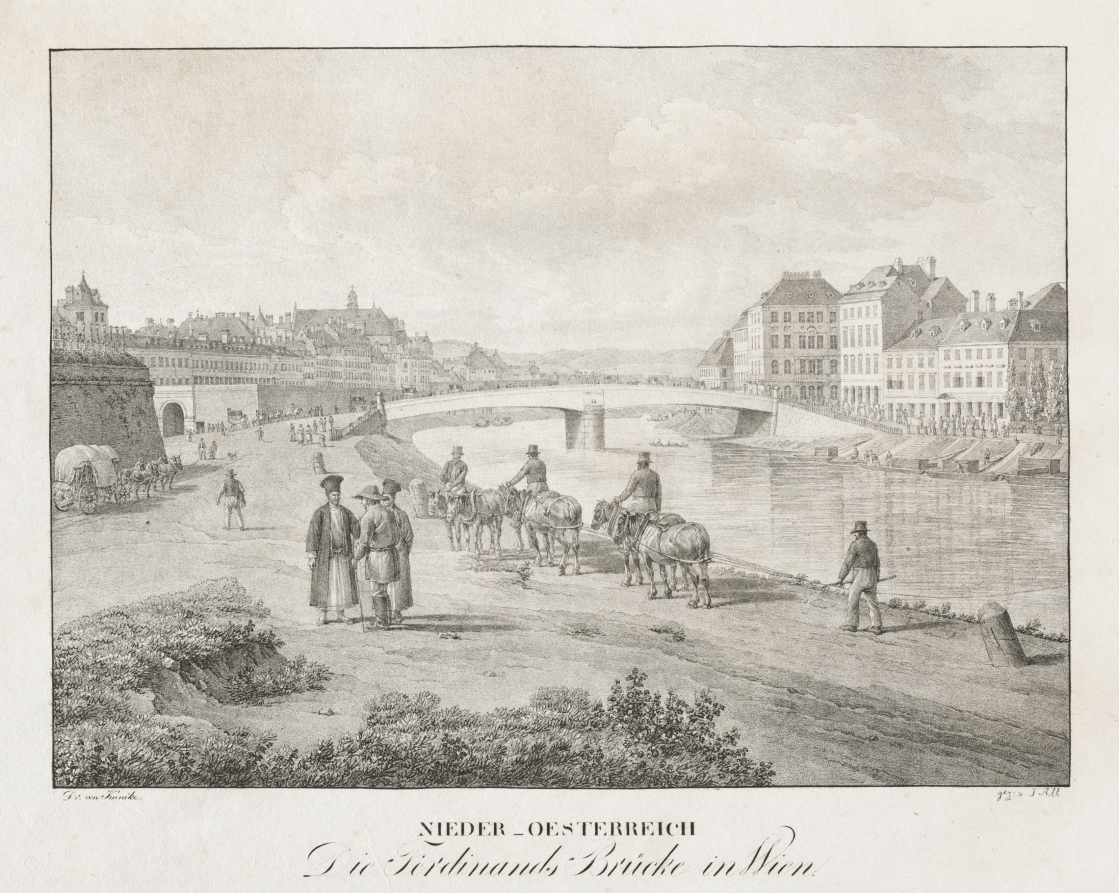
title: Nieder-oesterreich, Die Ferdinand Brucke in Wien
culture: Austria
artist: Jakob Alt (Austrian, 1789–1872)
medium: lithograph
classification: Print